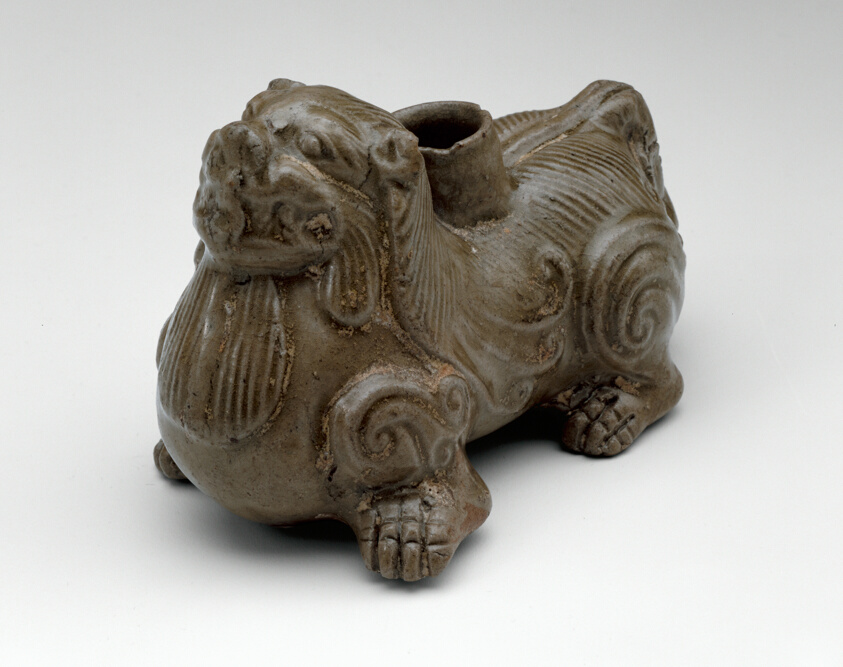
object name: Vessel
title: Stand in the Form of a Crouching Lion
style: Chinese (culture or style)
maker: China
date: Western Jin dynasty, (265–316), late 3rd century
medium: Yue ware; stoneware with underglaze molded decoration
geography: China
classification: stoneware; ceramics; asian art; vessel